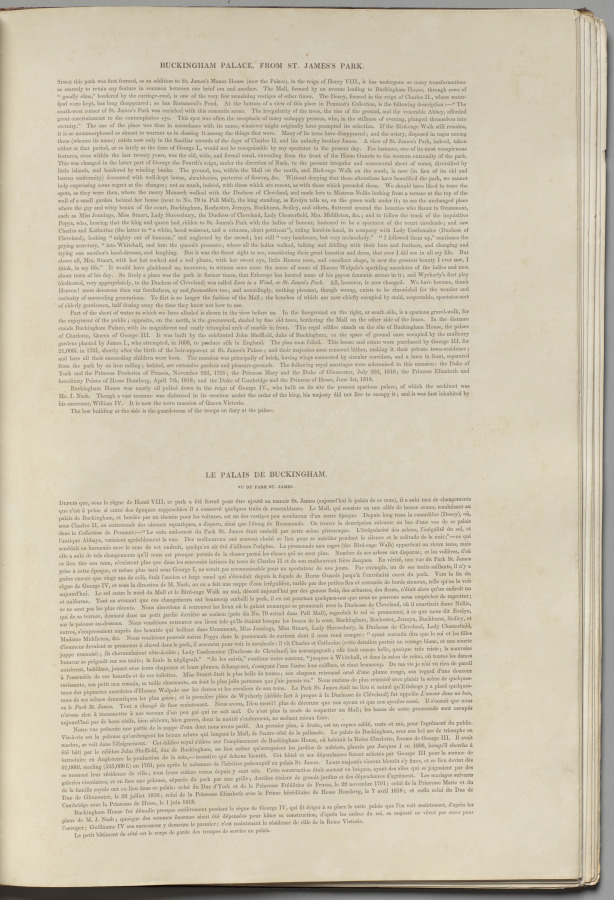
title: London As It Is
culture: England, 19th century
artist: Thomas Shotter Boys (British, 1803–1874)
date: 1842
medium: lithograph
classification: Bound Volume